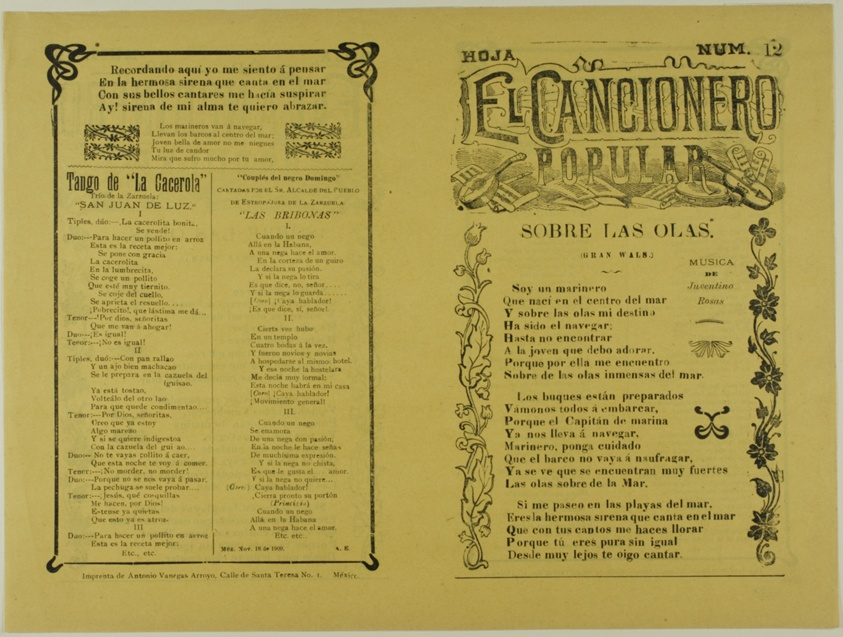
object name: Print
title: El cancionero popular, hoja num. 12 (The Popular Songbook, Sheet No. 12)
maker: Unknown Artist; Mexican, 19th century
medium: Relief print on paper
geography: Mexico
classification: relief etching; print; prints and drawing